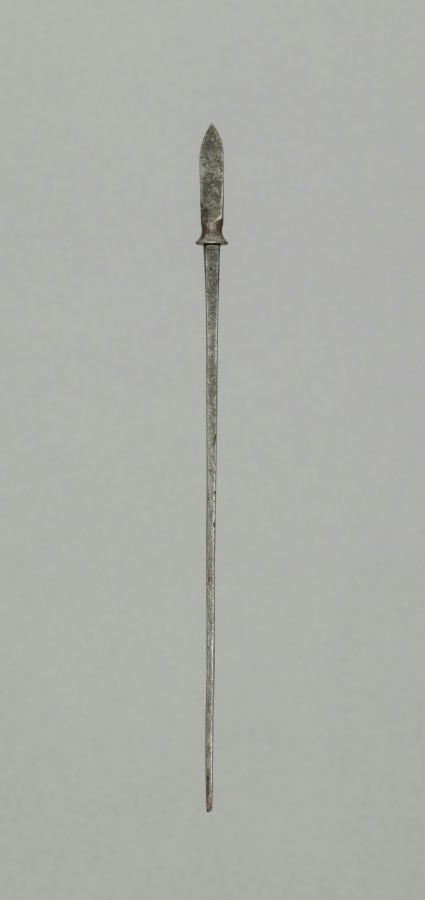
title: Arrow Point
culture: Japan, Edo period (1615–1868)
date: 1700s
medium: steel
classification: Arms and Armor